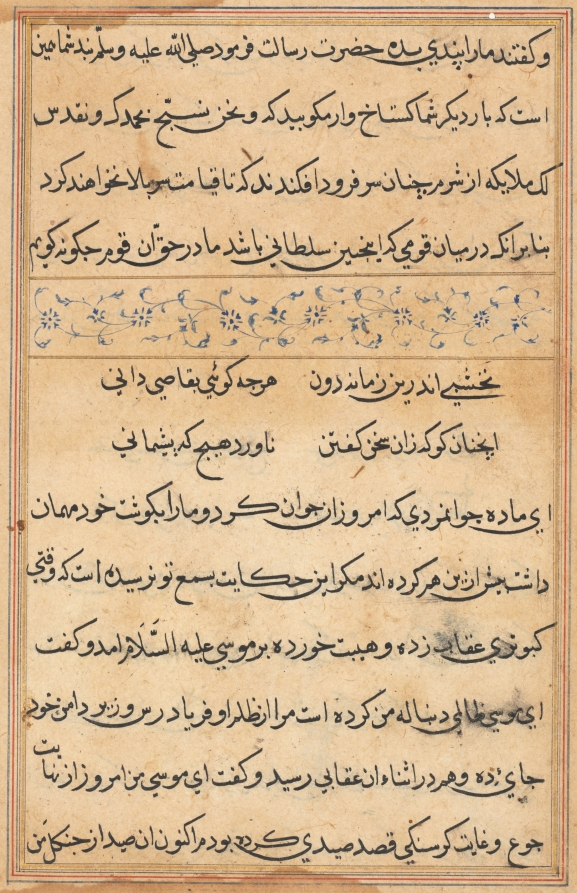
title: Page from Tales of a Parrot (Tuti-nama): text page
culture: Mughal India, court of Akbar (reigned 1556–1605)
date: c. 1560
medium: gum tempera, ink, and gold on paper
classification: Painting